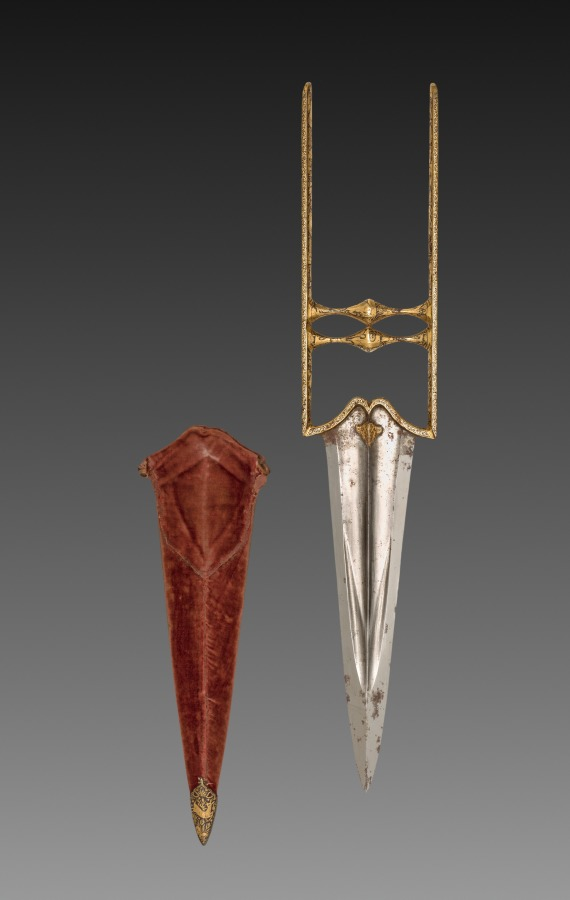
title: Katar dagger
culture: India, Mughal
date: 1700s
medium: Iron handle with gold inlay; steel blade; wooden sheath with velvet cover, brass boss, iron tip with gold inlay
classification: Arms and Armor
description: Stabbing daggers called katar were distinctive to India and often worn by soldiers and courtiers, tucked into their belts. Covering the entire handle are tiny scenes of lions and cheetahs hunting deer and buffalo in rocky wooded settings.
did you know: The ornament on the handle faces up from the perspective of a right-handed user, on all sides.